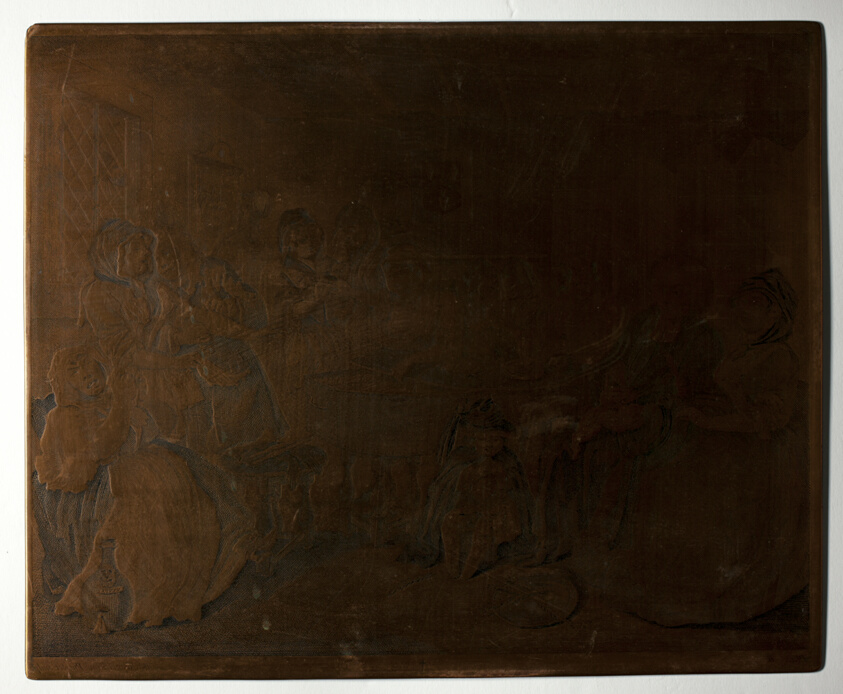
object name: Print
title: Plate six, from A Harlot's Progress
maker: William Hogarth (English, 1697-1764)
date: 1732, reworked/reissued 1744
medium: Copperplate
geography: England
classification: etching; print; prints and drawing